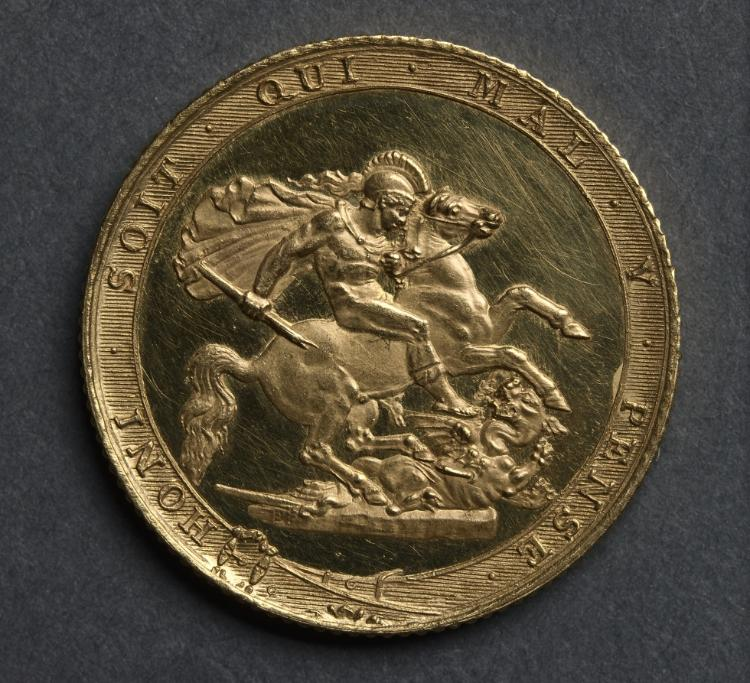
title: Sovereign: St. George Slaying the Dragon, within the Garter of the Order (reverse)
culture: England, George III, 1760-1820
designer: after Benedetto Pistrucci (Italian, 1784–1855)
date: 1817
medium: gold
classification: Coins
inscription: HONI ∙ SOIT ∙ QUI ∙ MAL ∙ Y ∙ PENSE